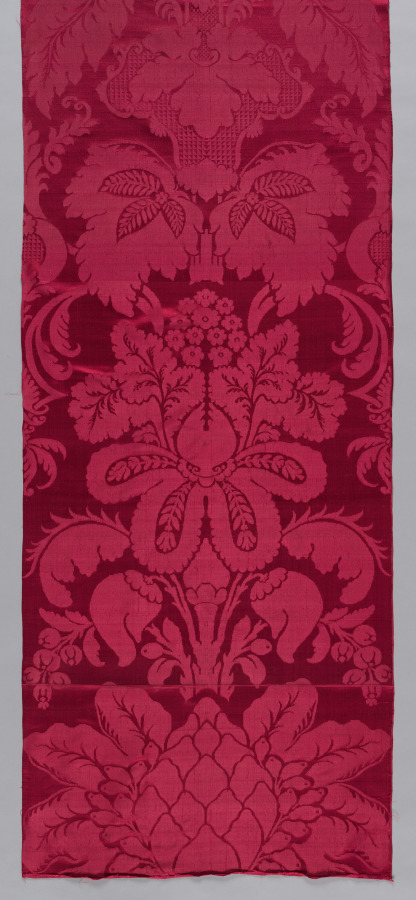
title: Two Large Damask Cloths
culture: Italy, 17th century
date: 1600s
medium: damask, silk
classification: Textile